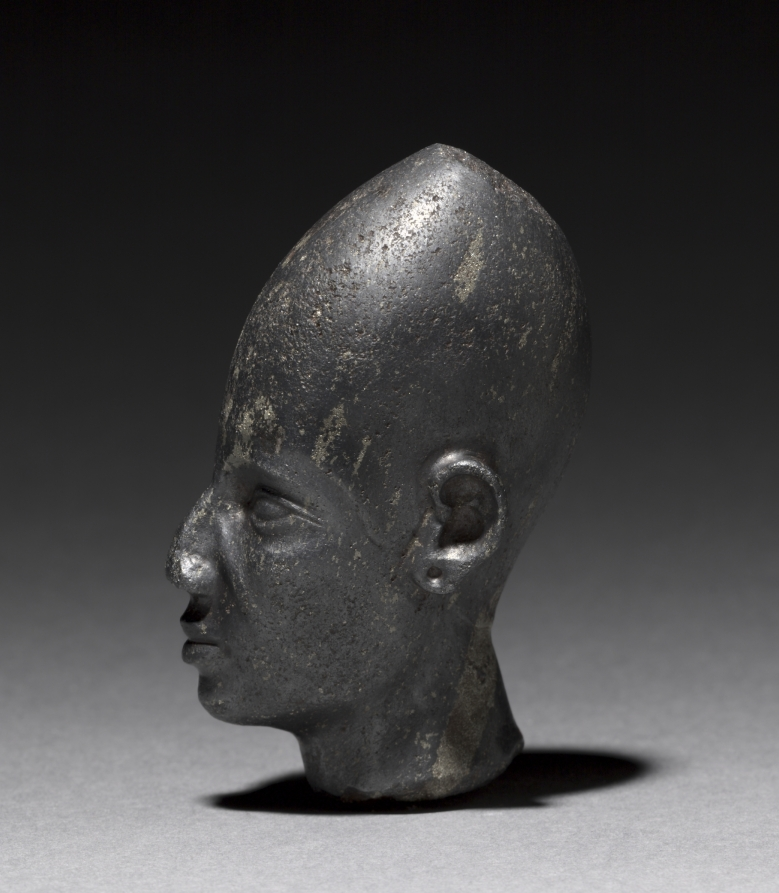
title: Head of Foreign God or Prince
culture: Egypt or Syria, New Kingdom (1540–1069 BCE), Dynasty 18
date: c. 1320 BCE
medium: black magnetite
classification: Sculpture